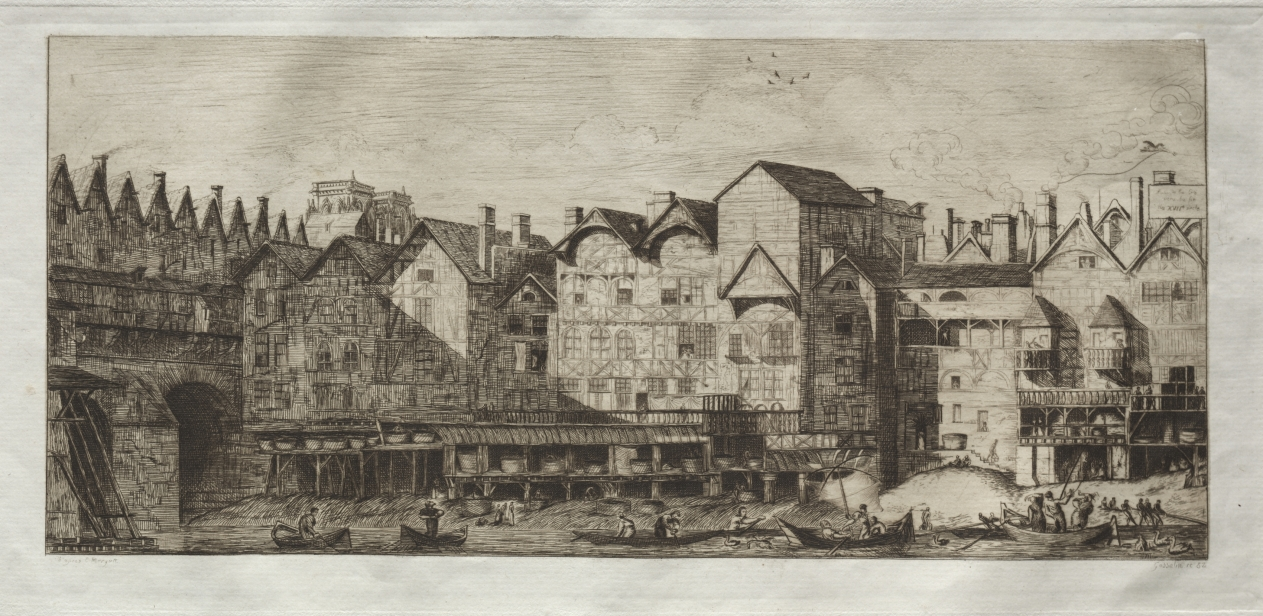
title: Partie de la cité vers la fin du XVIIe siècle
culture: France, 19th century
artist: Edmond Gosselin (French)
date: c. 1881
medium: etching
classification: Print